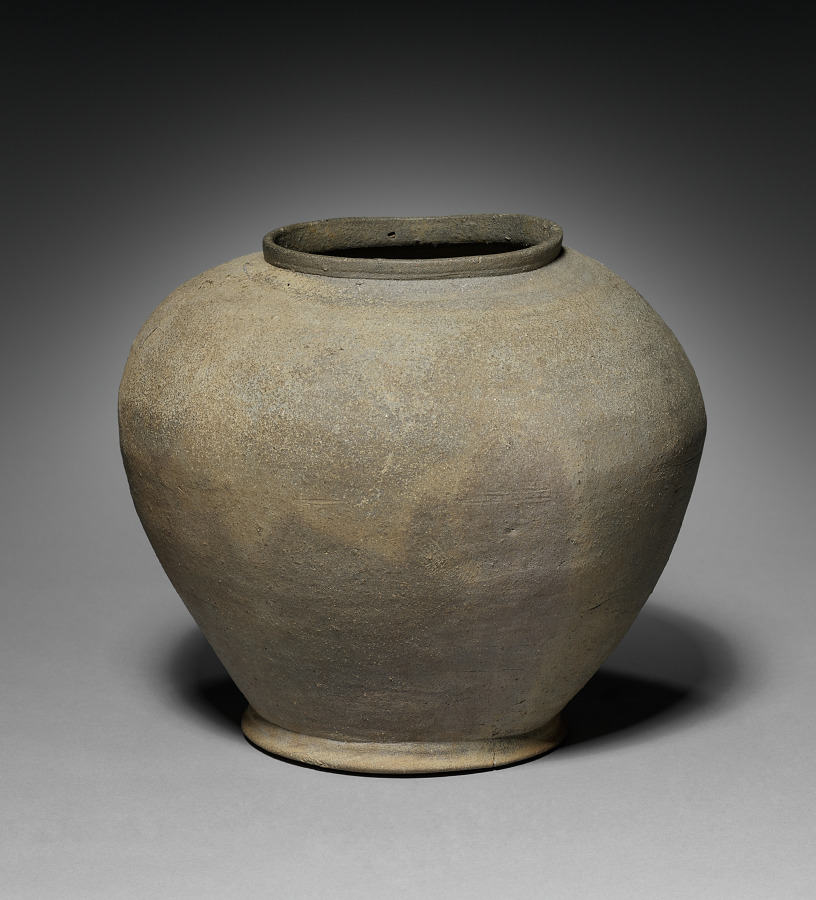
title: Cinerary Urn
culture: Japan, Heian period (794–1185)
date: c. 800–850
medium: stoneware with slight natural ash glaze (Sue ware)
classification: Ceramic